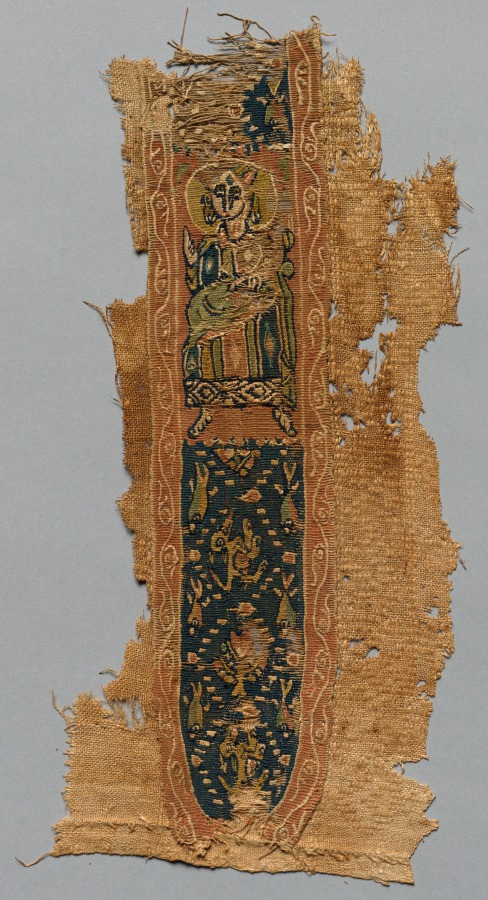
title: Fragment of a Clavus from a Tunic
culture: Egypt, Abbasid period(?), 8th - 9th century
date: 700s - 800s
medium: tapestry (originally inwoven in tabby ground); linen and wool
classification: Textile